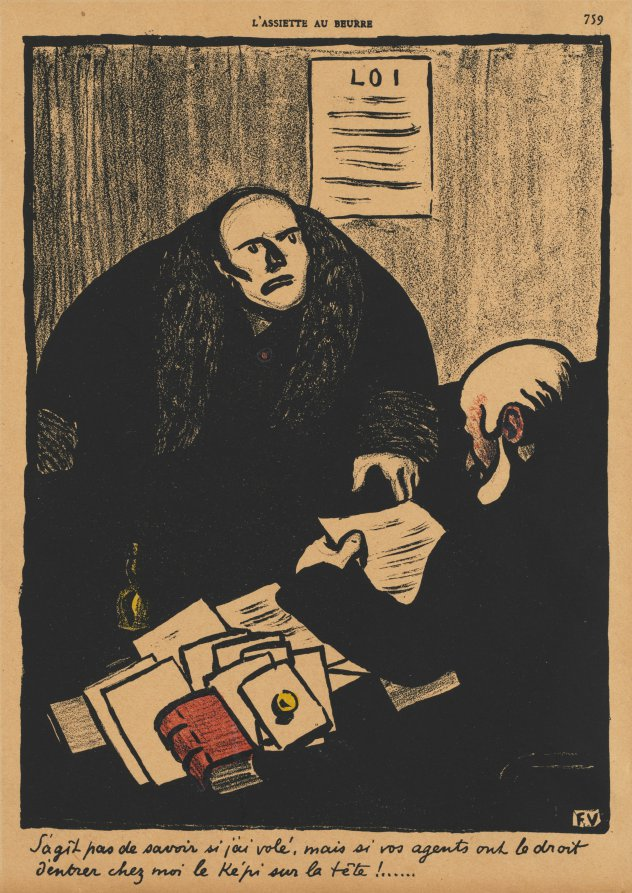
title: The question is, not whether...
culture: France, 19th century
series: Crimes and Punishments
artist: Félix Vallotton (Swiss French, 1865–1925)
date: 1901, published 1902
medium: color lithograph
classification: Print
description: This print was published in the magazine L’Assiette au Beurre (March 1, 1902 ) as plate 2 from the series Crimes and Punishments.